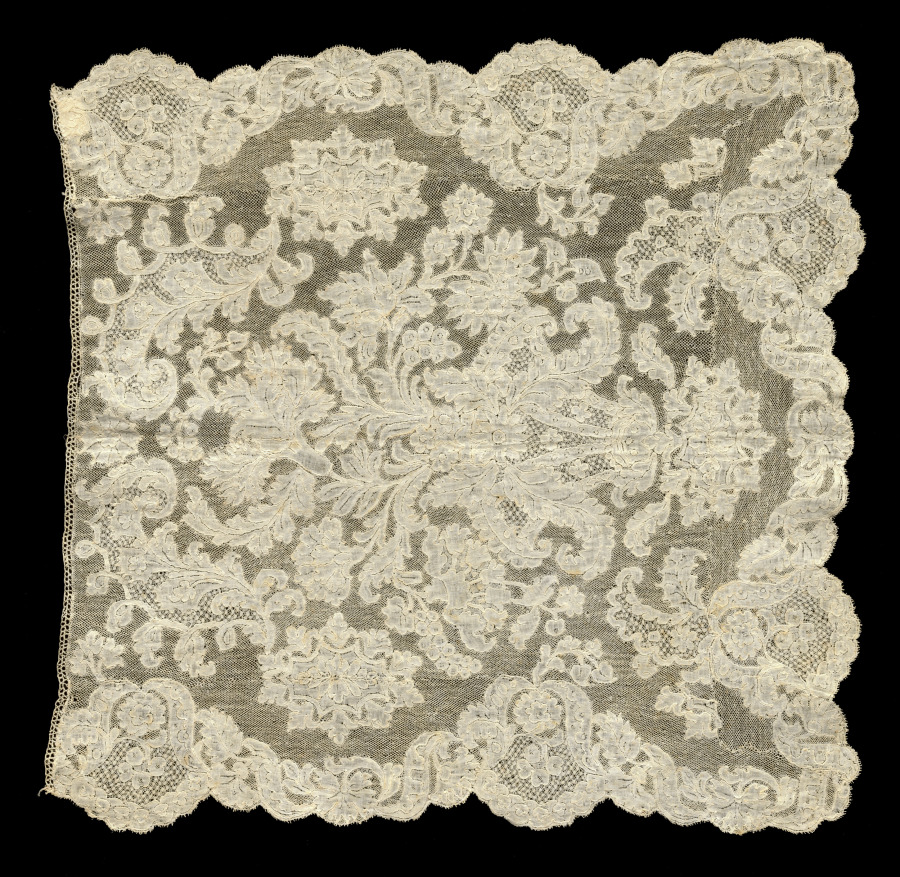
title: Lace Jabot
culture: Belgium, Mechelen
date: 1700–1720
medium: Linen: bobbin lace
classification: Lace